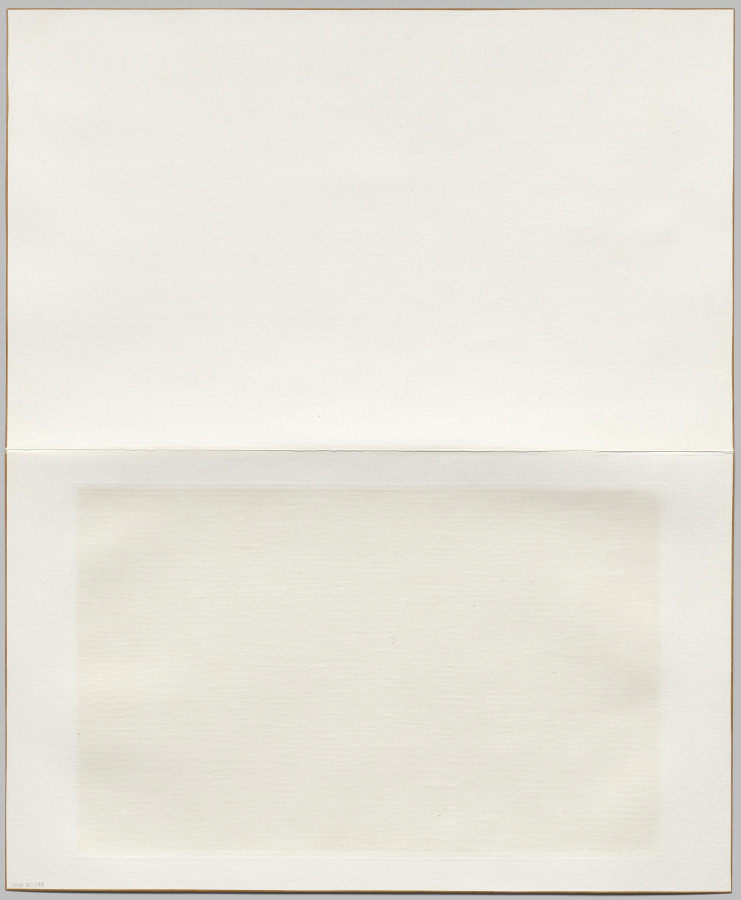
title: New Year's Day in a Village at Stone Lake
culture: China, Ming dynasty (1368–1644)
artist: Li Shida (Chinese, c. 1549–c. 1621)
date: 1609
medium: Album leaf; ink and light color on paper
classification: Painting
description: This rural scene presents typical activities of a New Year’s Day in which relatives and friends approach the house to convey their good wishes to the elders. Two boys in the courtyard light fire crackers, and servants in front of the main gate beat the gong to announce the guests. Inside the house, the hosts entertain their guests by offering hot wine and by writing New Year couplets to be hung on the gates welcoming the New Year. White cherry blossoms announce the spring. The water village at Stone Lake is characteristic of the Jiangnan region in southeast China. Born in Suzhou, the artist Li Shida may have even had his hometown in mind when he produced this painting.